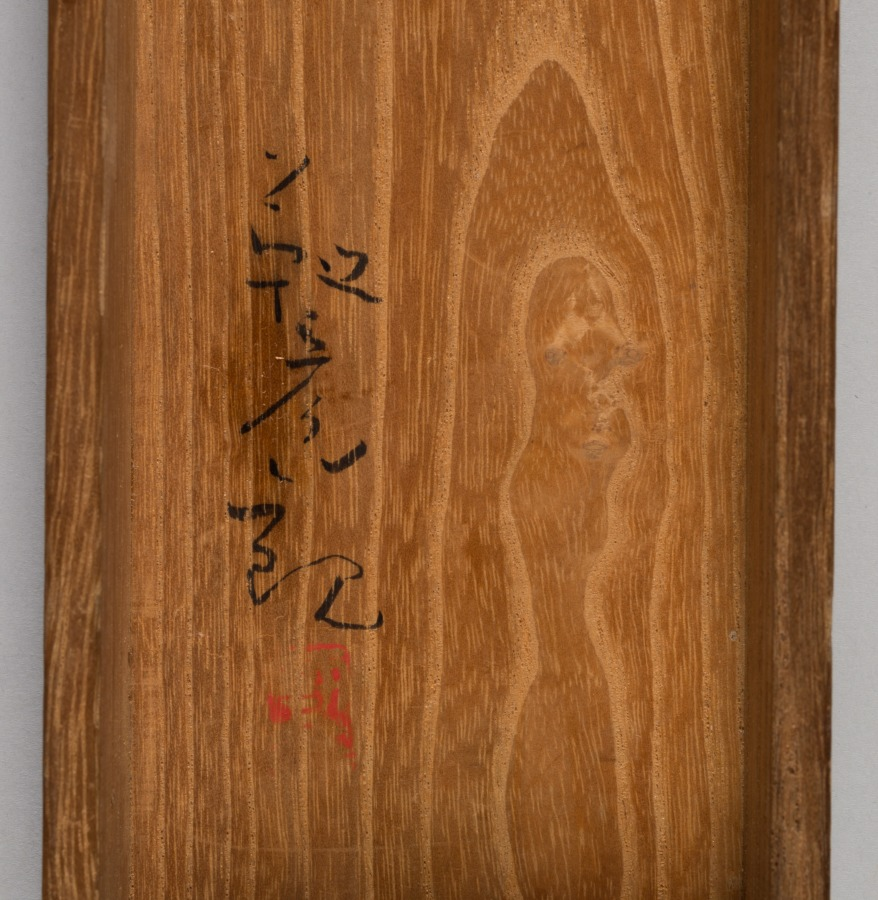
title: Puppy with Dandelions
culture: Japan, Edo period (1615–1868)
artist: studio of Tawaraya Sōtatsu (Japanese, c. 1570–c. 1640)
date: 1600–1640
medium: hanging scroll; ink on paper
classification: Painting